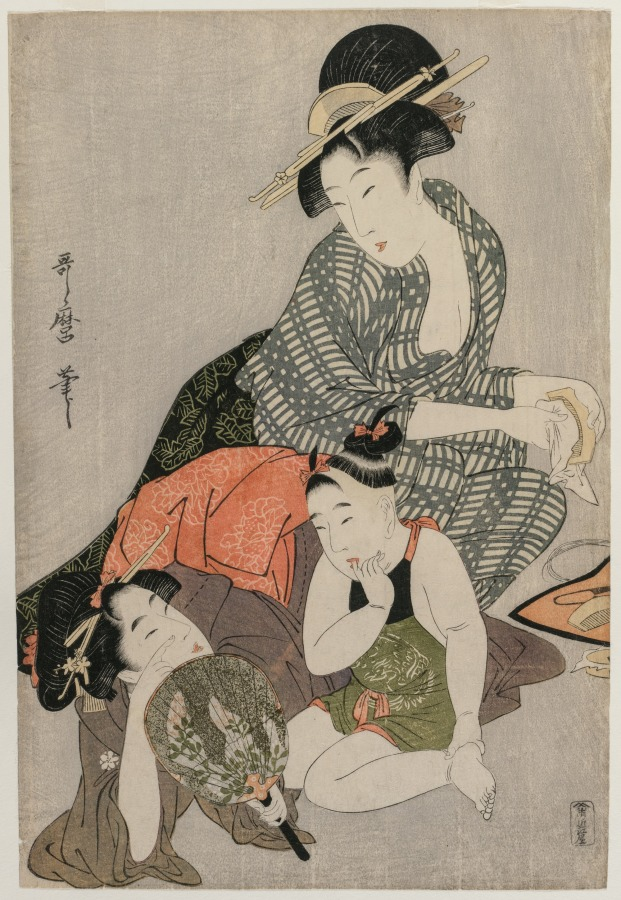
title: Cleaning Combs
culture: Japan, Edo period (1615–1868)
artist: Kitagawa Utamaro (Japanese, c. 1754–1806)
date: c. late 1790s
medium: color woodblock print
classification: Print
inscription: Artist's signature: Utamaro hitsu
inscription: Publisher: Ōmiya Gonkurō (Ōmiya, emblem)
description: In this print, a mother who has put up her child's hair into a neat bun cleans the comb. By the latter part of the Kansei era, or 1789-1801, Utamaro was frequently incorporating the activities of daily life into his images of beauties. Beyond serving as portraits, and depicting the bonds between mothers and children, the prints also take the view of a detached observer in their representations of everyday settings.